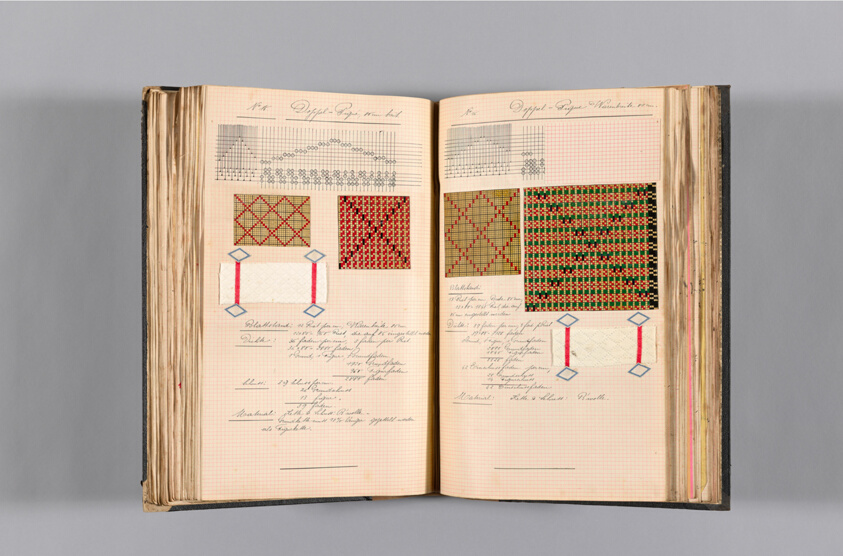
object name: Book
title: Student Notebook Containing Notes, Diagrams and Swatches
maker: Alfred Fehr (Switzerland, 1879-1955)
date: c. 1898–1900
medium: Bound notebook of technical notes and weave samples: fabrics for clothing and mixed goods, ribbed and twill cottons, and jacquard; 176 pages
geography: Germany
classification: book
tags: weaving, diagrams